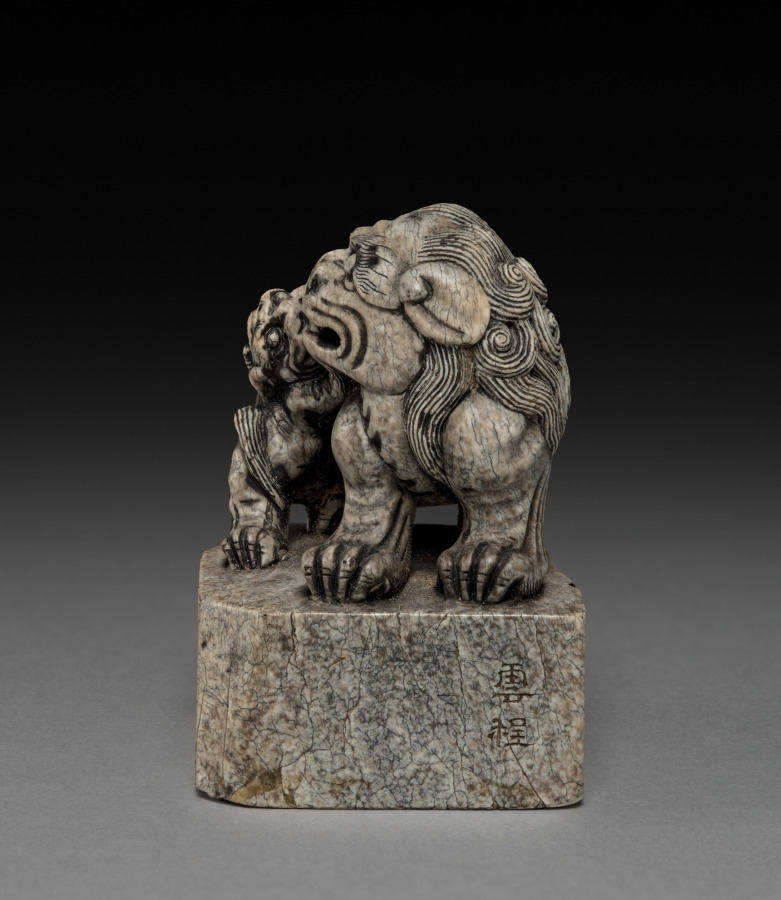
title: Seal: Lion and Cub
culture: China, Qing dynasty (1644-1911)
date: 1700s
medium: stone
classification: Stone